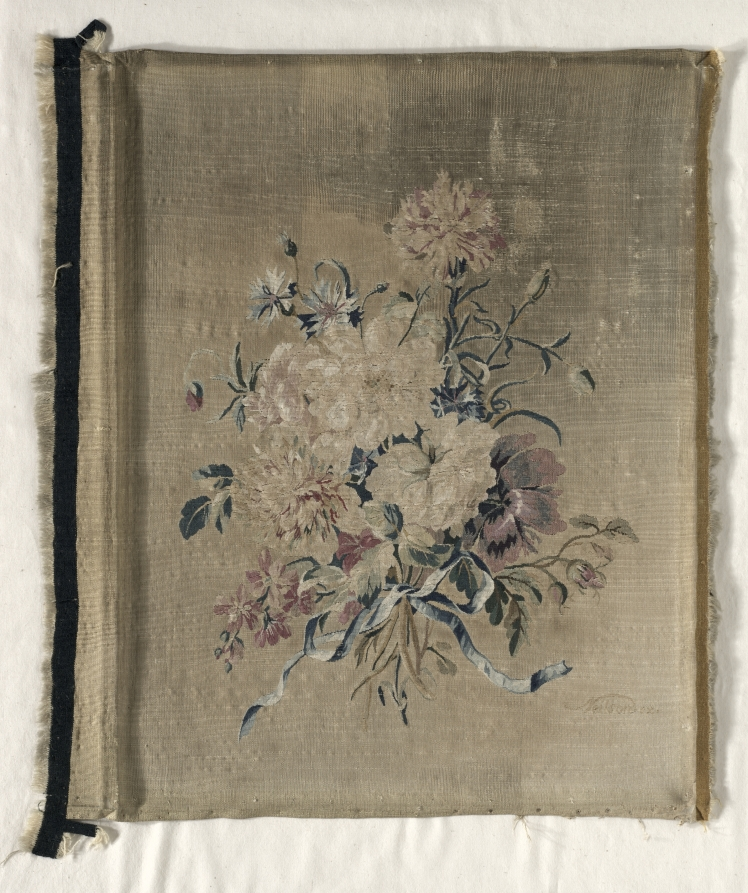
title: Tapestry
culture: France, 18th century (period of Louis XV)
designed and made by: Gobelins Manufactory (France, Paris, est. 1662)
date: c. 1760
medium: tapestry weave: silk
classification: Tapestry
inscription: signed lower right: "Neilson ex."